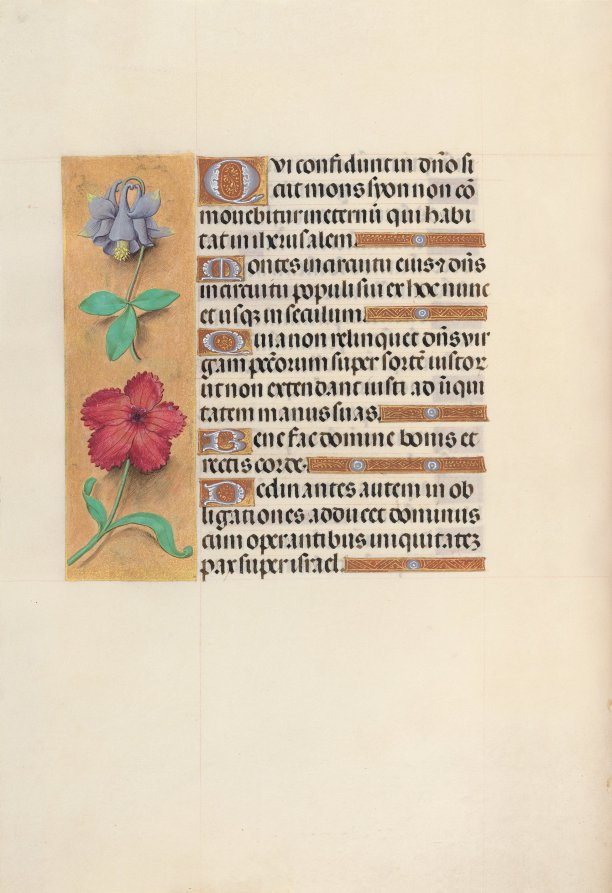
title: Hours of Queen Isabella the Catholic, Queen of Spain: Fol. 138v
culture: Flanders, Ghent and Bruges, late 15th century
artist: Master of the First Prayerbook of Maximillian (Flemish, c. 1444–1519)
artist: and Associates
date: c. 1500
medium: ink, tempera, and gold on vellum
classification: Bound Volume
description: This manuscript was illuminated by a circle of at least five highly organized manuscript painters active in the Flemish cities of Ghent and Bruges. The principal illuminator was Alexander Bening, who painted the majority of the book's miniatures. Manuscripts produced by this circle of artists are renowned for the decoration of their borders, which typically feature a rich variety of realistically-painted flowers, birds, and butterflies. This prayer book, called a book of hours, was intended not for a cleric, but for the private devotions of a lay person-in this case, Isabella the Catholic, Queen of Spain (1451-1504). Isabella's coat of arms embellishes the book's frontispiece. It is unlikely that the book was commissioned by the Queen herself; rather, she probably received it as a diplomatic gift from someone courting her patronage, perhaps Cardinal Francisco Jimenez de Cisneros. A Franciscan friar, Jimenez was dependent upon Isabella for his advancement, first to the post of Queen's confessor in 1492, and then to Archbishop of Toledo in 1495.